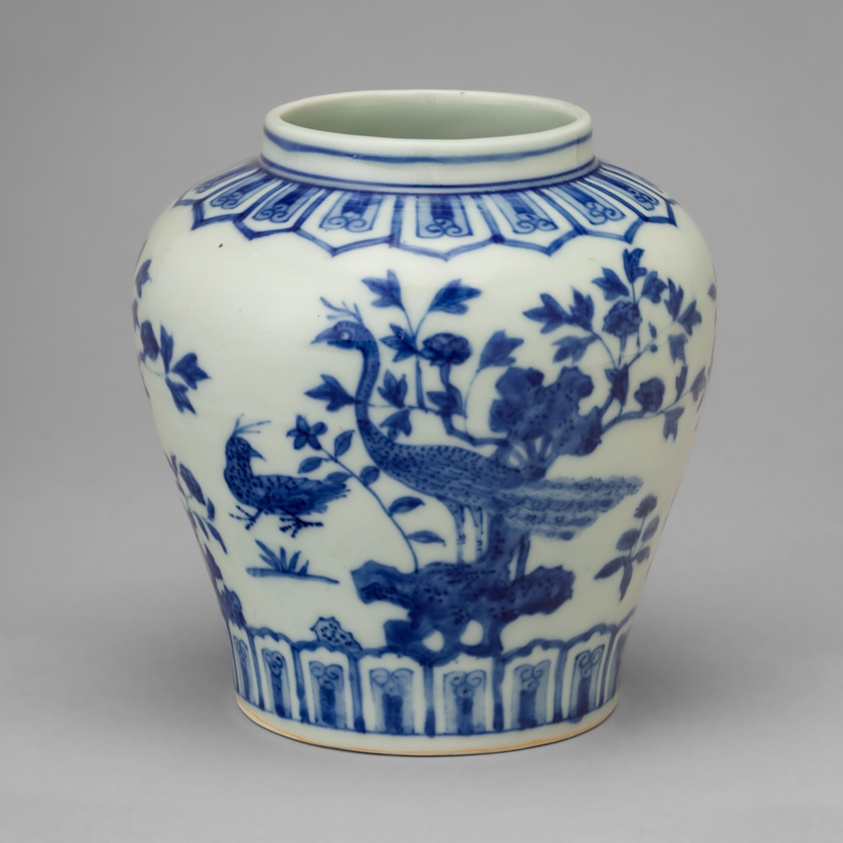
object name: Decorative Arts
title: Jar with Peacocks, Garden Rock, and Foliage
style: Chinese (culture or style)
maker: China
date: Ming dynasty, mark and period of Jiajing (1522–66)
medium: Porcelain painted in underglaze blue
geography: China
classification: porcelain; asian art; ceramics; decorative arts